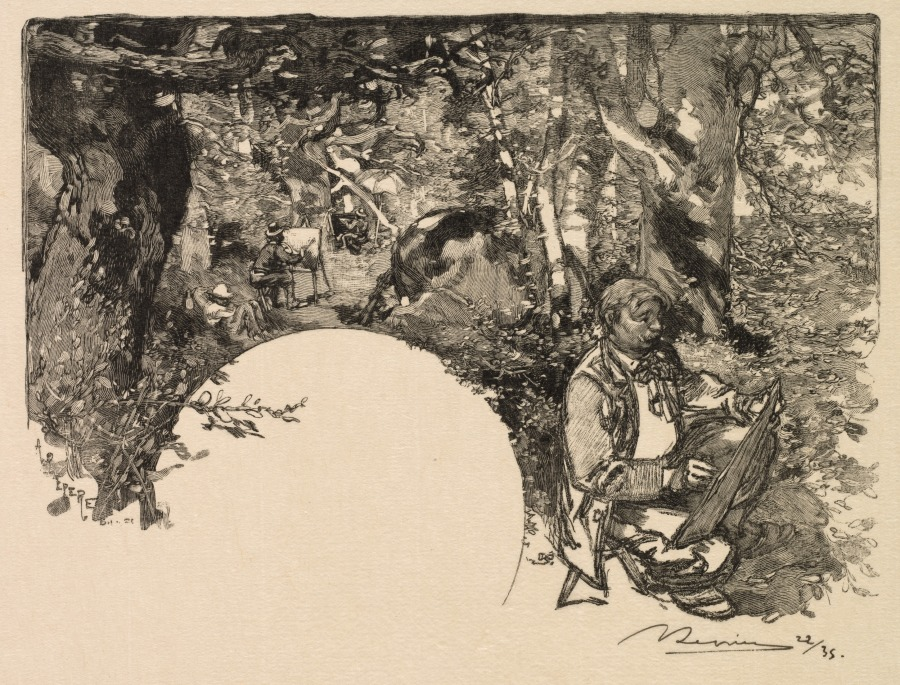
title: Fontainebleau Forest: The Painters (La Forêt de Fontainebleau: Les Peintres)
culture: France, 19th century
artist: Auguste Louis Lepère (French, 1849–1918)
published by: A. Desmoulins, Published in Revue Illustrée, 1887–90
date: 1890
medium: wood engraving from bound volume of 34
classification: Bound Volume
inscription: In block, lower left: A. LEPERE del. sc.; below image, lower right, in black ink: ALepère 22/35; on window mat, lower right, in graphite: Les Peintres